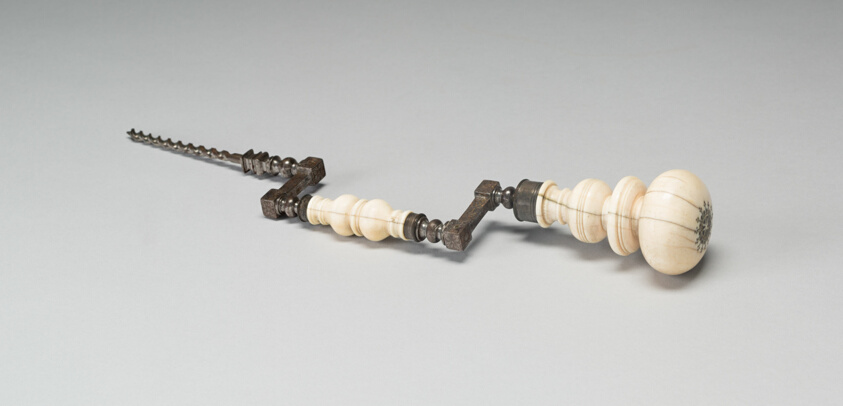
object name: Metalwork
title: Borer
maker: France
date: 17th century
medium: Turned steel, ivory, brass, and wood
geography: France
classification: tool; european decorative arts; metalwork